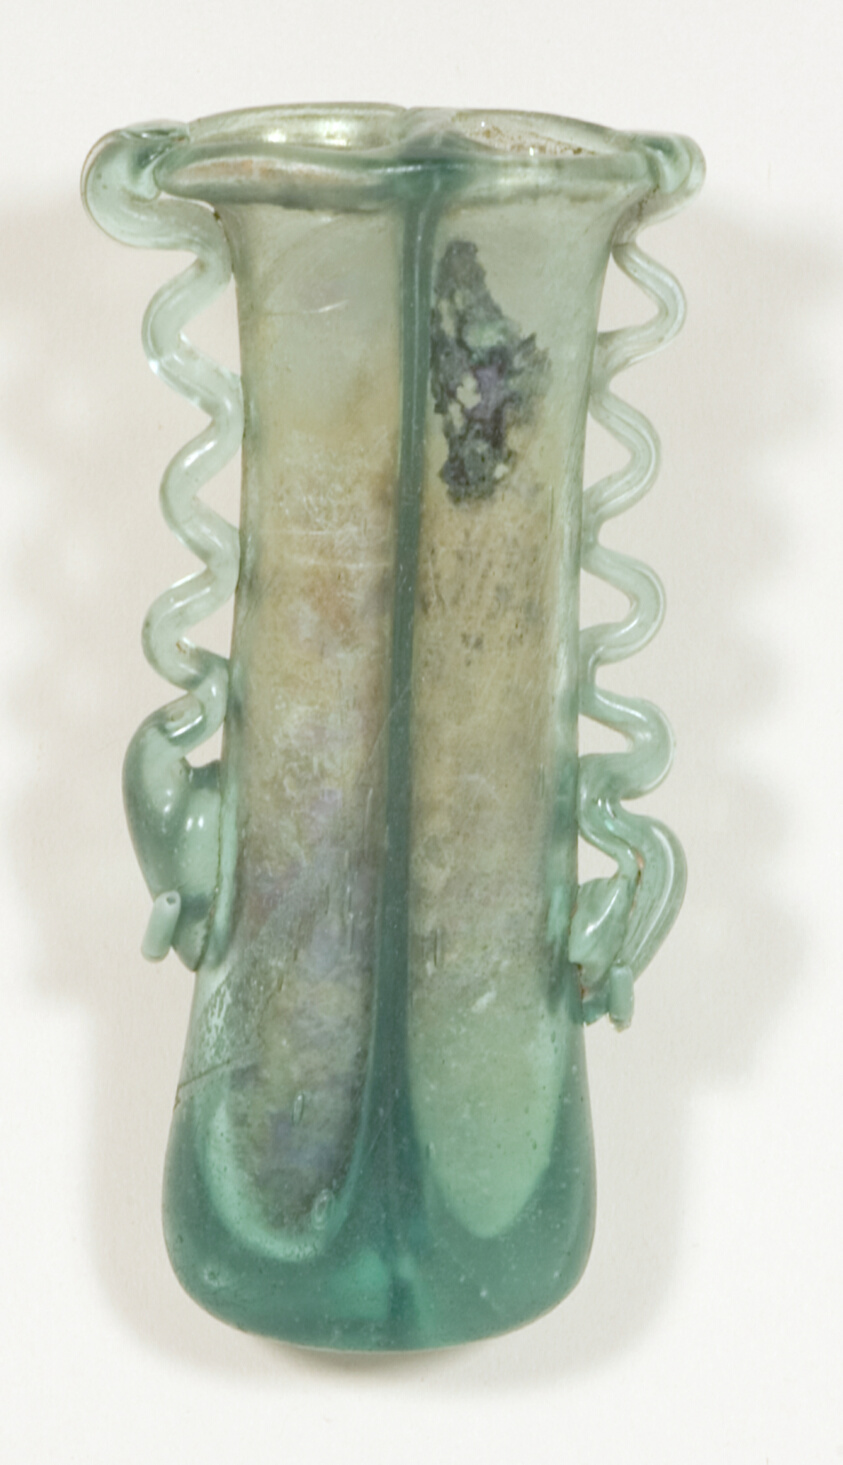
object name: Vessel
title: Kohl Container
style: palestinian, syrian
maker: Byzantine; Eastern Mediterranean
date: 5th-6th century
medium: Glass, blown technique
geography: Levant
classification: glass; personal grooming / hygiene / cosmetic container; vessel; ancient art